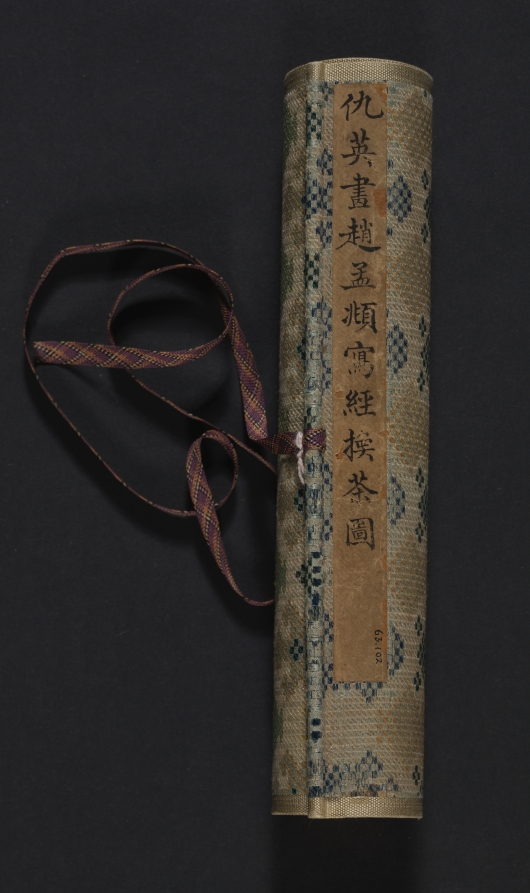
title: Zhao Mengfu Writing the Heart (Hridaya) Sutra in Exchange for Tea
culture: China, Ming dynasty (1368–1644)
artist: Qiu Ying (Chinese, 1494–1552)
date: 1542–43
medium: handscroll, ink and light color on paper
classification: Painting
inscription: Inscription accompanying text of "Heart" sutra, by Wen Zhengming 文徵明 (1470-1559): Zhengming 徵明, written in a boat at Kunshan 崑山, on the twenty-first day of the ninth month, in the renyin 壬寅 year, the twenty-first year of the Jiajing era [1542].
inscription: Colophon by Wang Shih-mou: Chou Yü-shün [Feng-lai] of K'un-shan was a scholarly, refined connoisseur of antiquities. He had acquired the poem written by Chao Ch'eng-chih [Chao Meng-fu] about the exchage of tea for Chao's calligraphy of the Prajna sutra. But the sutra itself, also written by Chao Meng-fu, is lost. He therefore asked Ch'iu Shih-fu [Ch'iu Ying] to do a painting and had Wen Cheng-ming, the artist-in-attendance, write the Hridaya Sutra in the "small, regular" style for replacement. Both works are so excellent that even Chao Meng-fu himself would certainly applaud if he should be reborn to see them. I, Shih-mou, had gotten possession of this scroll from the family of Chou Yü-shün, and since it was so wonderfully matched with one of the treasures in my collection. the Hridaya Sutra written by Chao Meng-fu for Priest Li in "running script," like the reuniting of two halves of a jade pi, I completed the scroll with the several colophons written for the "tea-exchange" poem. I did this because the painting of Ch'iu Ying and the calligraphy of Wen Cheng-ming are definitely masterpieces by themselves with absolutely no need to depend on any of the colophons written for the Chao Meng-fu poem. Furthermore, the two sons of Wen Cheng-ming, Shou-ch'eng [Wen P'eng] and Hsiu-ch'eng [Wen Chia]. have each written a colophon explaining the reason for replacing the calligraphy. As their writings are both acceptable for high standard, I didn't want to throw them away. [So by separating these into two scrolls] I was able to get two complete works of art in one clever stroke. I was quite pleased with myself, and hope that those who see this scroll shall not get suspicious because of the missing colophons. Wang Shih-mou wrote in his Jih-sun-chai study, on the first day of the tenth month, in the chia-shen year of the Wan-li era [1584].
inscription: Colophon by Wen P'eng: I-shao [Wang Hsi-chi] wrote in exchange for a flock of geese. Su Tung-po wrote in exchange for meat. Both episodes have become legends of a thousand years. Sung-hsüeh [Chao Meng-fu] "teased" Priest Kung for tea, and the story was immediately immortalized in the poems by all the famous scholars of the times. Indeed, how could one say his humor and elegance are not equal to the ancient worthies? Unfortunately, the poetry has survived but the writing of the sutra is lost. Yü-shün [Chou Feng-lai] therefore asked my father to make up the writing and so here is the complete work of art. Respectfully inscribed by Wen P'eng in the mid-summer of 1543.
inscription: Colophon by Wen Chia: Sung-hsüeh [Chao Meng-fu], in exchanging tea leaves for his writing of the Prajna, had put himself in the company of Yu-chün [Wang Hsi-chih] who exchanged geese for his writing of the Huang-t'ing sutra [the Yellow Chamber, or the Wai-ching ching, a Taoist text attributed to the Yellow Emperor]. However, was this romantic and cultivated gesture really intended for such small things? Actually, he was only proud that the excellence of his calligraphy had made him worthy to be the successor of the Ch'in Dynasty master. Since, very unfortunately, Chao Meng-fu's writing [of the Prajna] was already lost, my father therefore agreed to replace it, and did the calligraphy in the style of the Yellow Chamber. In addition, Yu-shün [Chou Feng-lai] had asked Mr. Ch'iu Shih-fu [Ch'iu Ying] to do a painting of the sutra writing story in the style of Li Lung-mien at the head of the scroll. Now it would seem the entire episode should go down in history for immortality. Respectfully recorded by Wen Chia, on the eighth day of the eighth month, in the year of k'uei-mao [1543]. trans. WKH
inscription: 4 colophons and 23 seals: 1 colophon, dated 1543, and 2 seals of Wen Peng (1498-1573); 1 colophon, dated 1543, and 2 seals of Wen Chia (1501-1583); 1 colophon, dated 1584, and 3 seals of Wang Shih-mou (1536-1588); 2 seals of Chou Feng-lai (16th c.); 3 seals of Sung Lo (1634-1713); 5 seals of the Ch'ien-lung emperor (r. 1736-95); 1 colophon, dated 1902, and 1 seal of Fei Nien-tz'u (1885-1905); 4 seals of Wan-go H. C. Weng (b. 1918); 1 seal unidentified.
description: The Yuan dynasty calligrapher Zhao Mengfu (1254–1322) is said to have transcribed the Heart Sutra for a certain priest named Li in exchange for tea. Later, during the Ming dynasty, the professional painter Qiu Ying from Suzhou painted this scene for his patron. Here, Zhao Mengfu holds a brush and has a piece of paper laid out before him. On the table is an ink stone, an ink stick, and a small water dropper. Drops of water would dissolve the ink stick into liquid ink when it was ground on the flat square stone.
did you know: Qiu Ying was born to a peasant family, but his natural talent led him to a successful career as a professional painter with wealthy patrons.